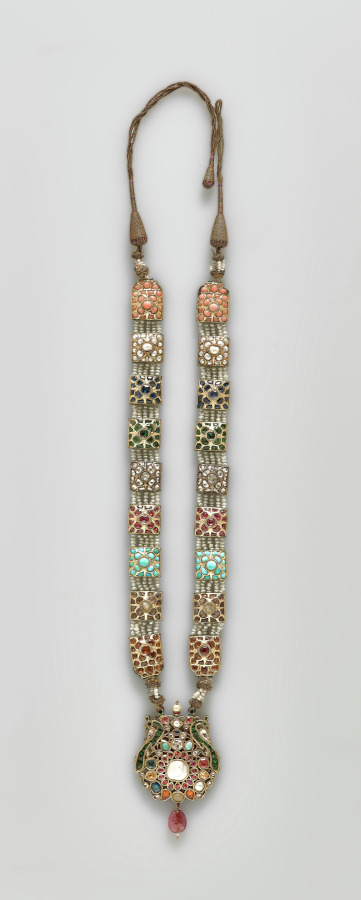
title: Jeweled Necklace and Pendant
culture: India, Delhi in the Punjab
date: before 1916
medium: gold, enamel and gems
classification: Jewelry